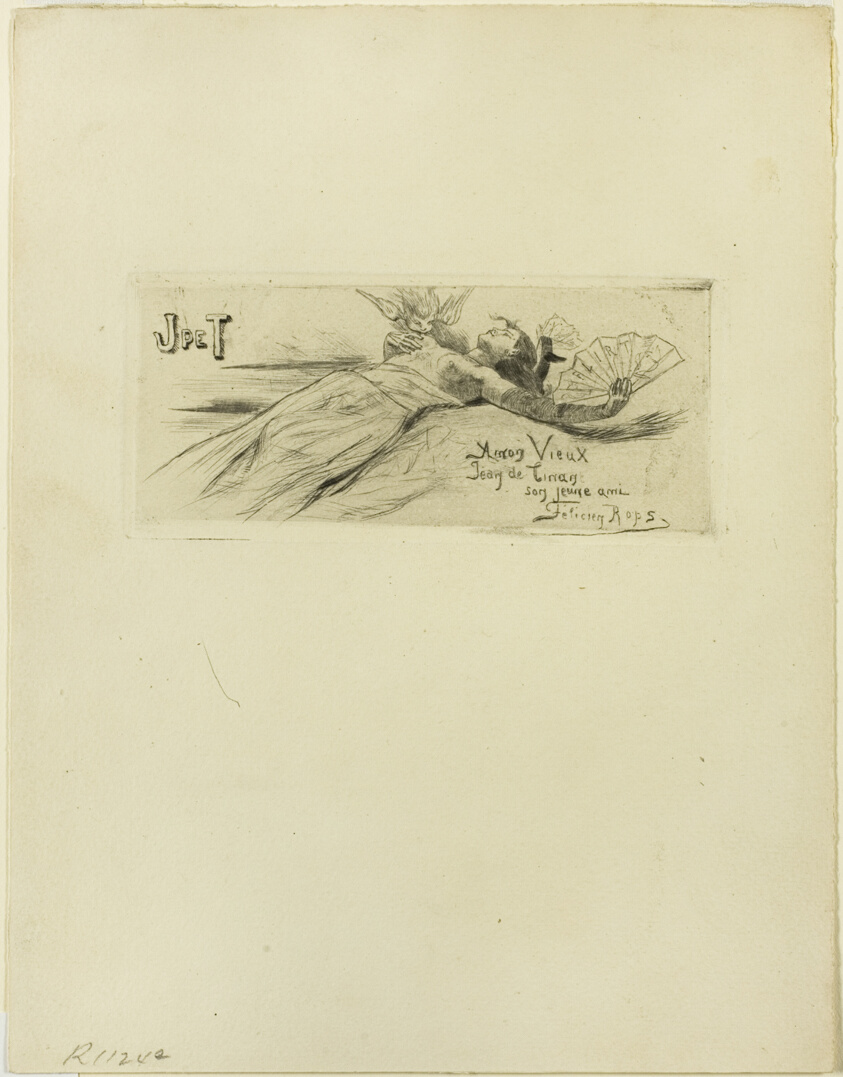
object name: Print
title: Flirt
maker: Félicien Rops (Belgian, 1833-1898)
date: 1894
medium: Soft varnish etching ("vernis mou") and drypoint on ivory wove paper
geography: Belgium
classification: etching; print; prints and drawing